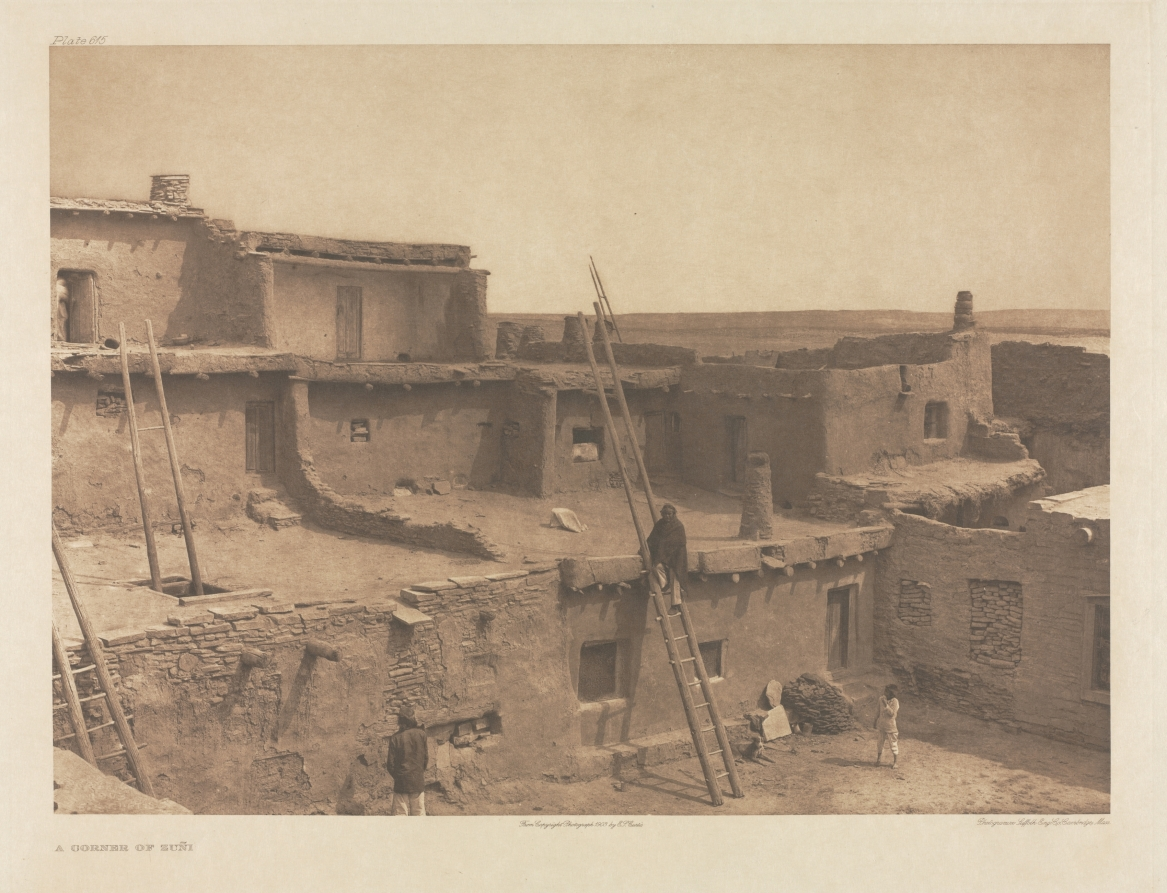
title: Portfolio XVII, Plate 615: A Corner of Zuñi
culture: America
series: The North American Indian: being a series of Portfolios picturing and describing the Indians of the United States, the Dominion of Canada, and Alaska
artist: Edward S. Curtis (American, 1868–1952)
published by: The University Press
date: 1903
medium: photogravure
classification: Portfolio